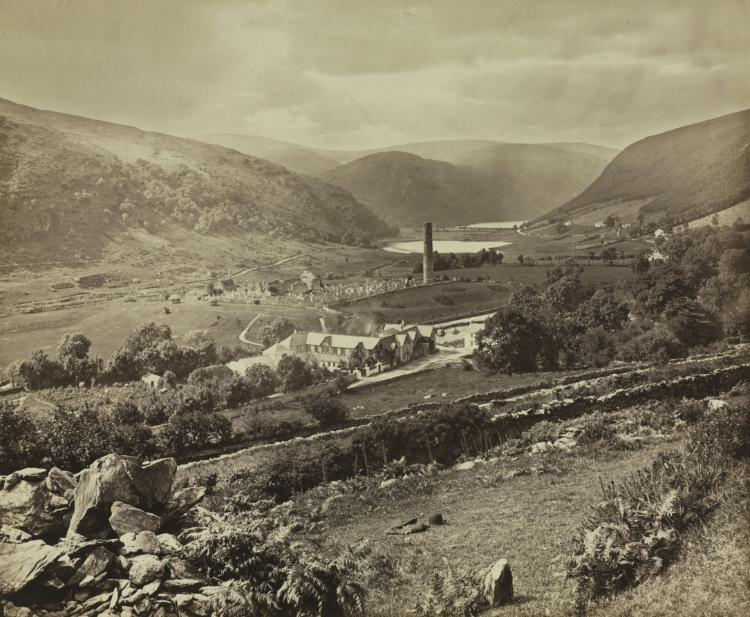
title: The Valley of Glendalough, County Wicklow, Ireland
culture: England, 19th century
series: Monuments and Ruins of Erin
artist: William Russell Sedgfield (British, 1826–1902)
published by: W. Russell Sedgfield and Thomas Ogle, privately compiled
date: c. 1864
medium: albumen print from wet collodion negative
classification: Photograph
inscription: Written in pencil on recto of mount: "SEDGFIELD"; "The Valley of Glendalough Co Wicklow"; in black ink on verso of mount: "Russell Sedgfield / SEDGFIELD + OGILVY"; in pencil: "W. Russell Sedgfield / or / THOMAS OGLE / IRELAND CA 1862-64"; "382"